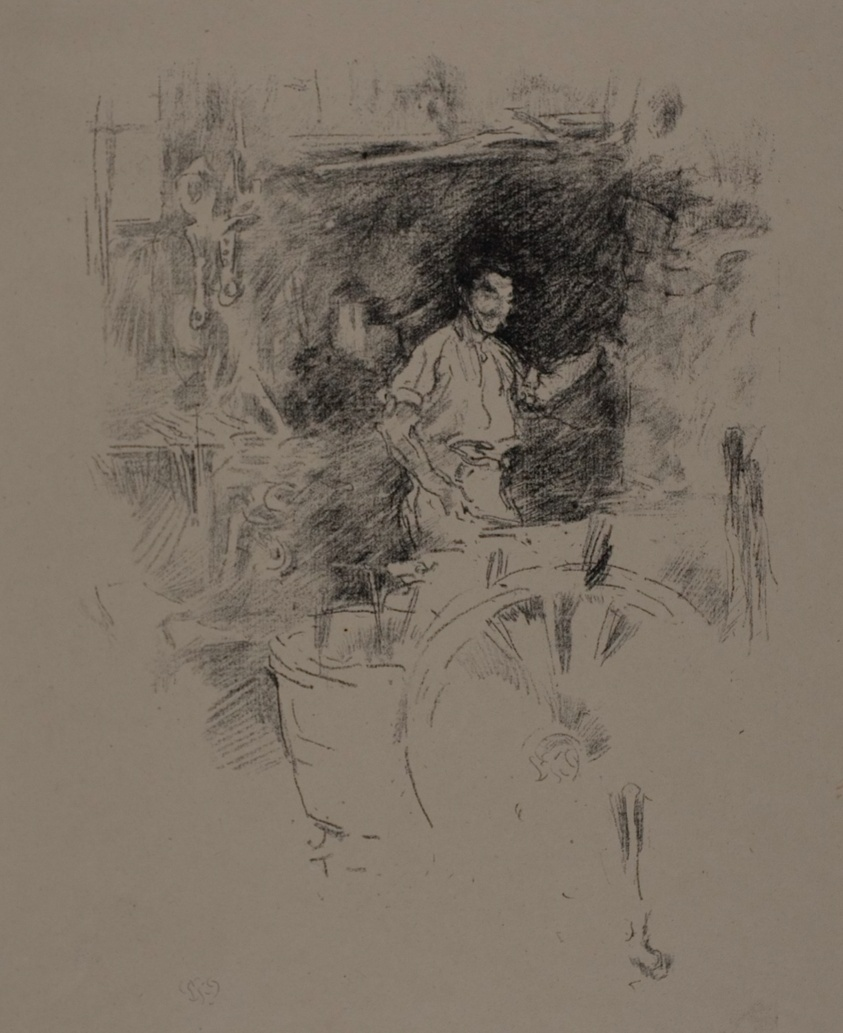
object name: Print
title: The Blacksmith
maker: James McNeill Whistler (American, 1834-1903)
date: 1895/96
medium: Transfer lithograph in black with stumping, on buff wove proofing paper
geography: United States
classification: transfer lithograph; lithograph; print; prints and drawing; paper